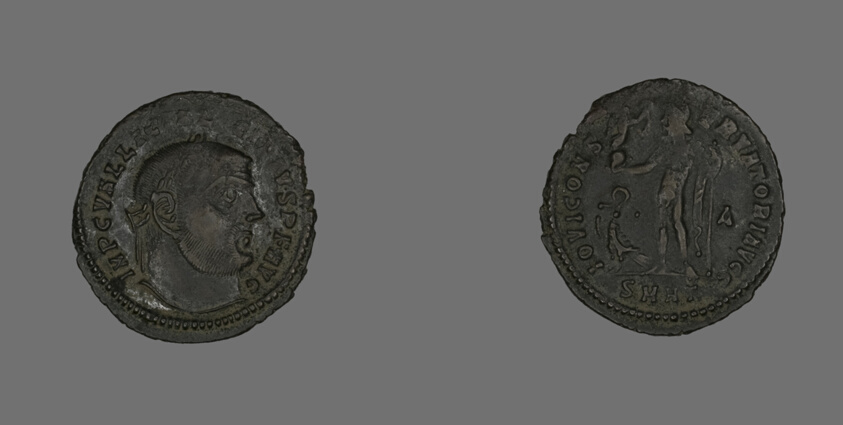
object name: Coin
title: Follis (Coin) Portraying Emperor Licinius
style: roman (ancient, style or period), ancient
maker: Roman, minted in Heraclea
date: 313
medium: Bronze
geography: Roman Empire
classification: coin; ancient art